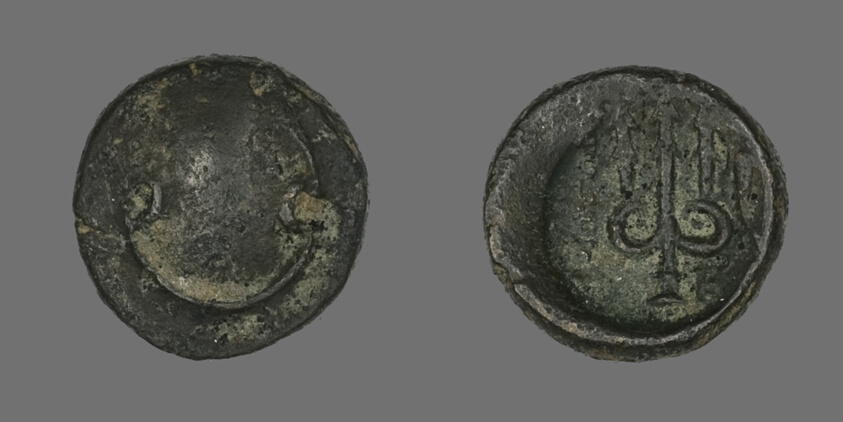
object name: Coin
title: Coin Depicting a Boeotian Shield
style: greek, ancient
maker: Greek; Boeotia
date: 196-146 BCE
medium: Bronze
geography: Ancient Greece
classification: coin; ancient art